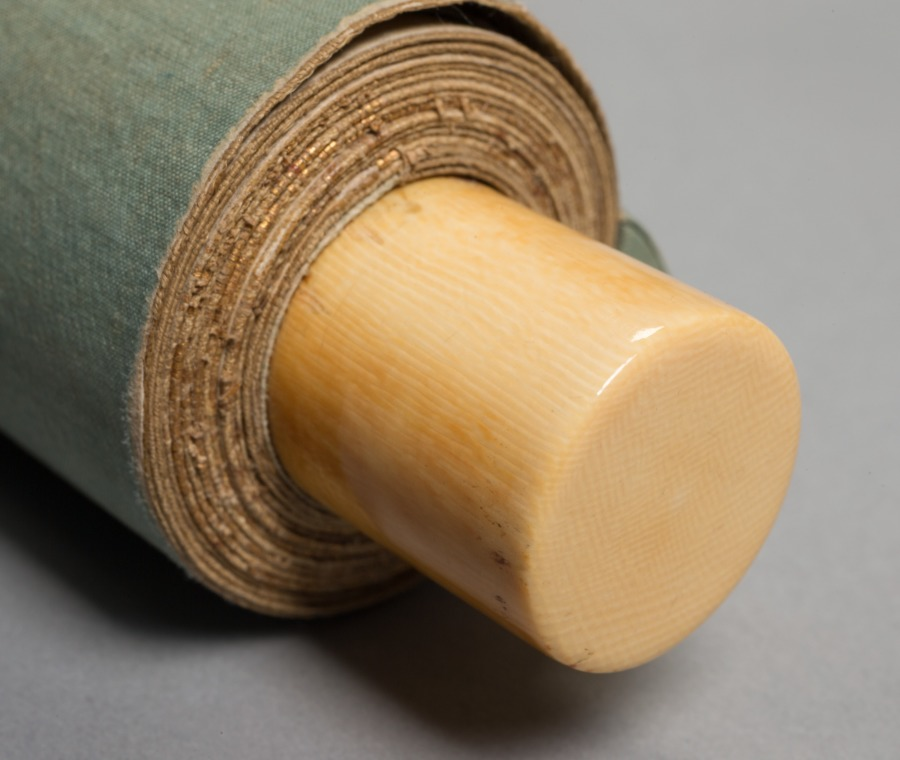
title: Hotei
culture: Japan, Muromachi period (1392–1573)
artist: Kichizan Minchō (Japanese, 1352–1431)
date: late 1300s–early 1400s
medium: hanging scroll; ink and slight color on paper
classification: Painting